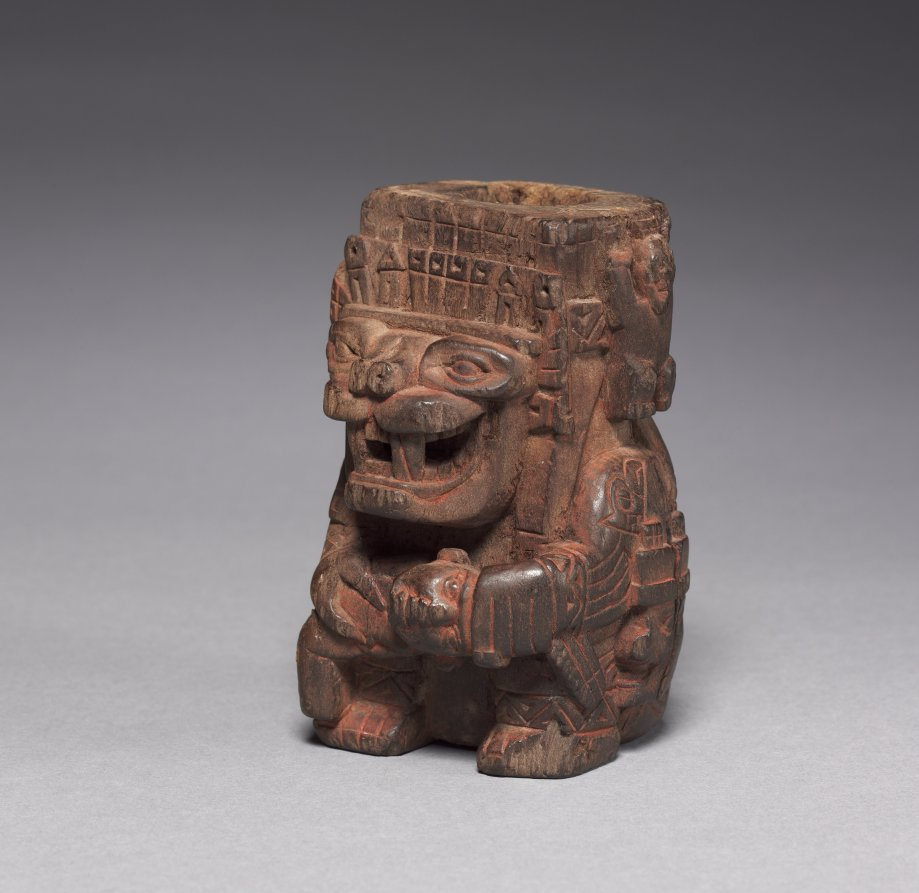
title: Sacrificer Container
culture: Central Andes, Wari style (600-1000)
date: 770–890 (radiocarbon date, 95% probability)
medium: wood and cinnabar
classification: Wood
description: This container assumes the shape of a magnificent, feline-headed, supernatural sacrificer who draws a knife across the throat of the human it holds in its lap. Severed human heads hang from the feline's belt and dangle by the trachea at the back of its headdress. Sacrifice had a place in Wari religious practice, probably as an unusual and exceptionally precious offering made to entice the benevolence of cosmic forces. Indeed, colonial-period Andean people believed that death was a prerequisite for the renewal of the world.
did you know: Traces of cinnabar, a toxic mercuric sulfide, are visible on the container's surface.